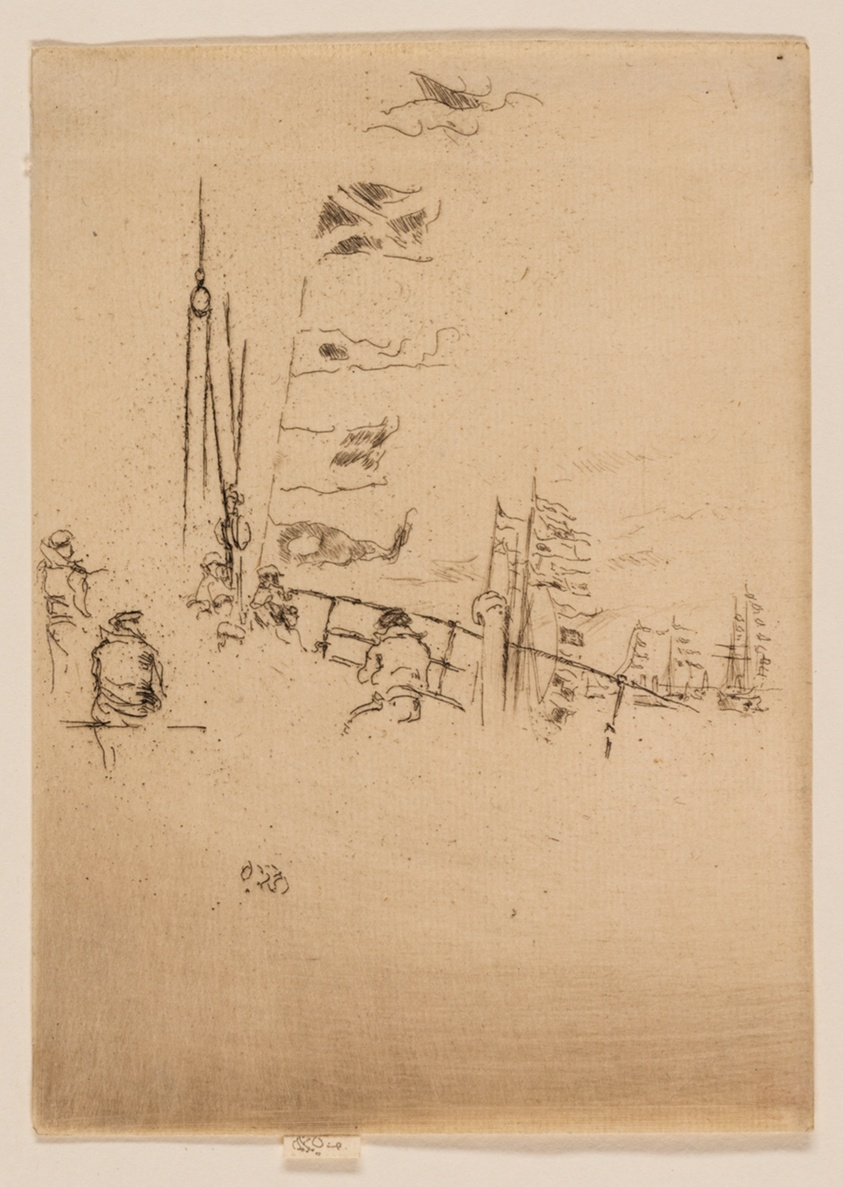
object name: Print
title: Bunting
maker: James McNeill Whistler (American, 1834-1903)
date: 1887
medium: Etching and drypoint with foul biting in black ink on cream laid paper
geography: United States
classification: etching; foul biting; print; prints and drawing; drypoint; paper